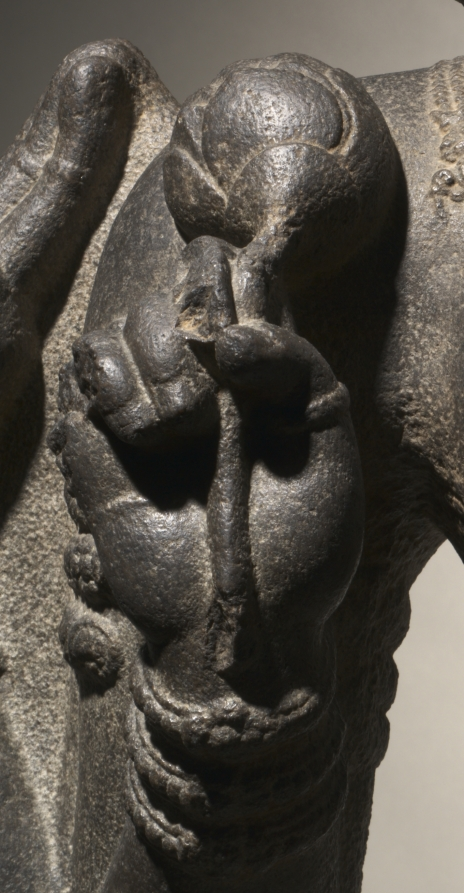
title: Brahma-Shiva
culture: South India, Tamil Nadu, Chola dynasty, late 10th - early 11th century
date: late 900s–1000s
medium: granite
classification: Sculpture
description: In the Hindu pantheon Brahma is in charge of carrying out the work of creation. In this tour-de-force of South Indian temple sculpture, he is in a special regal aspect, with the only elements of his typical priestly appearance being the prayer beads and the matted dreadlocks piled on his head. Four arms connote superhuman power, and four heads convey the idea that his creative activities spread in all four directions. His upper right hand enjoins freedom from fear, and the lower holds a lotus bud associated with birth and the process of creation. His lowered left hand is held in the gift-giving gesture, suggestive of the gift of creation he will bestow upon the world.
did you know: The back of the sculpture retains the original textured surface from a pointed chisel, suggesting it was in a niche or near a wall, protected from worshippers’ touches.